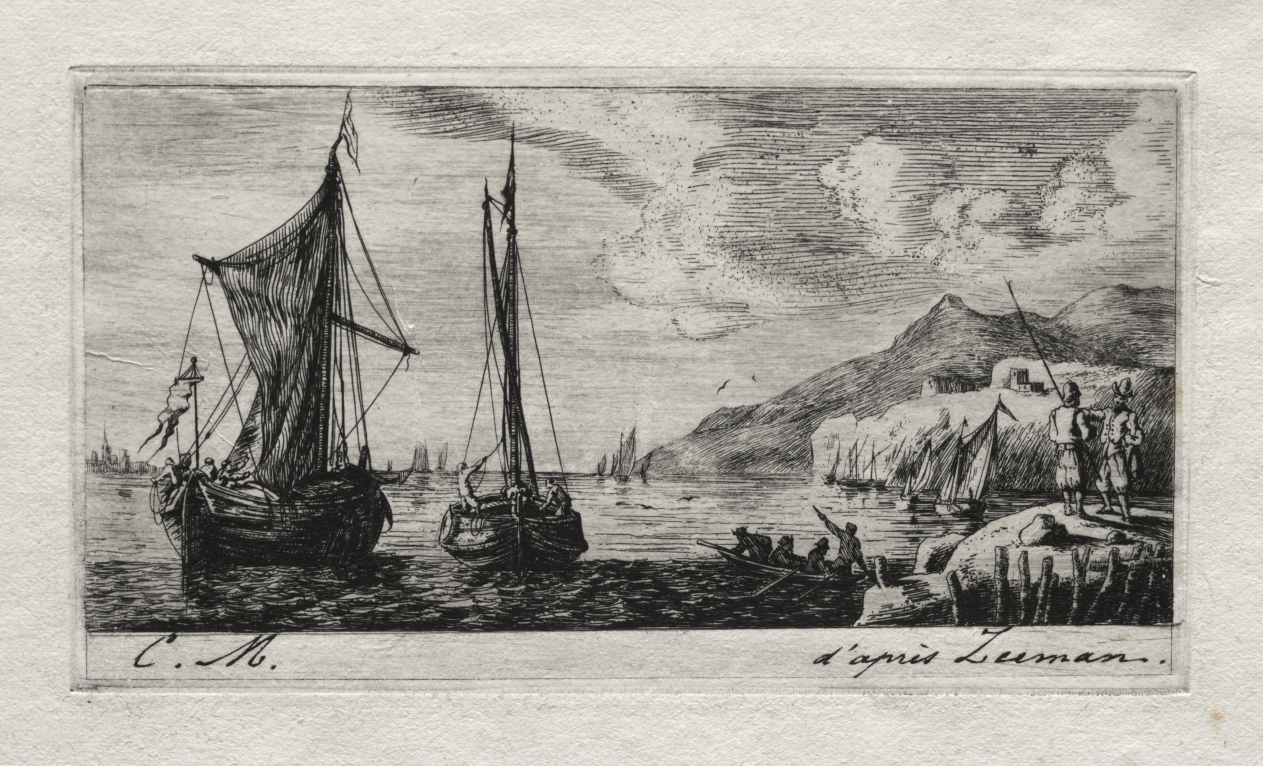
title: Calais - Flushing Boats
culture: France, 19th century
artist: Charles Meryon (French, 1821–1868)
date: 1850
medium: etching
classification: Print